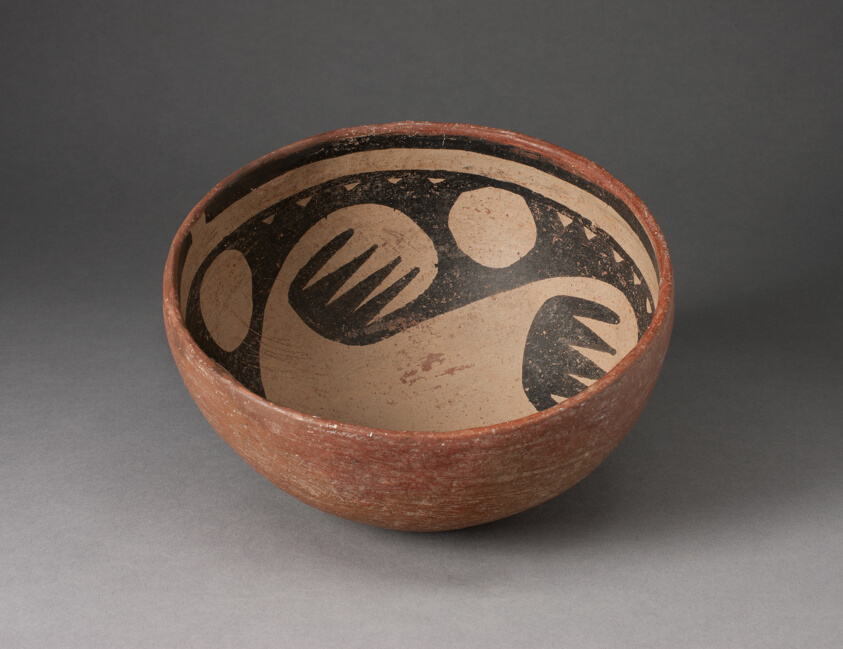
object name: Vessel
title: Miniature Bowl with Interior Bird-Wing Motif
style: ancestral pueblo (anasazi), anasazi, Pre-Columbian, americas, southwest, pueblo, Arts of the Americas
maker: Ancestral Pueblo (Anasazi), Gila Polychrome; Arizona, Southwest, United States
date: 1250–1400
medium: Ceramic and pigment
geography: Southwest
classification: bowl; earthenware; ceramics; vessel; art of the americas